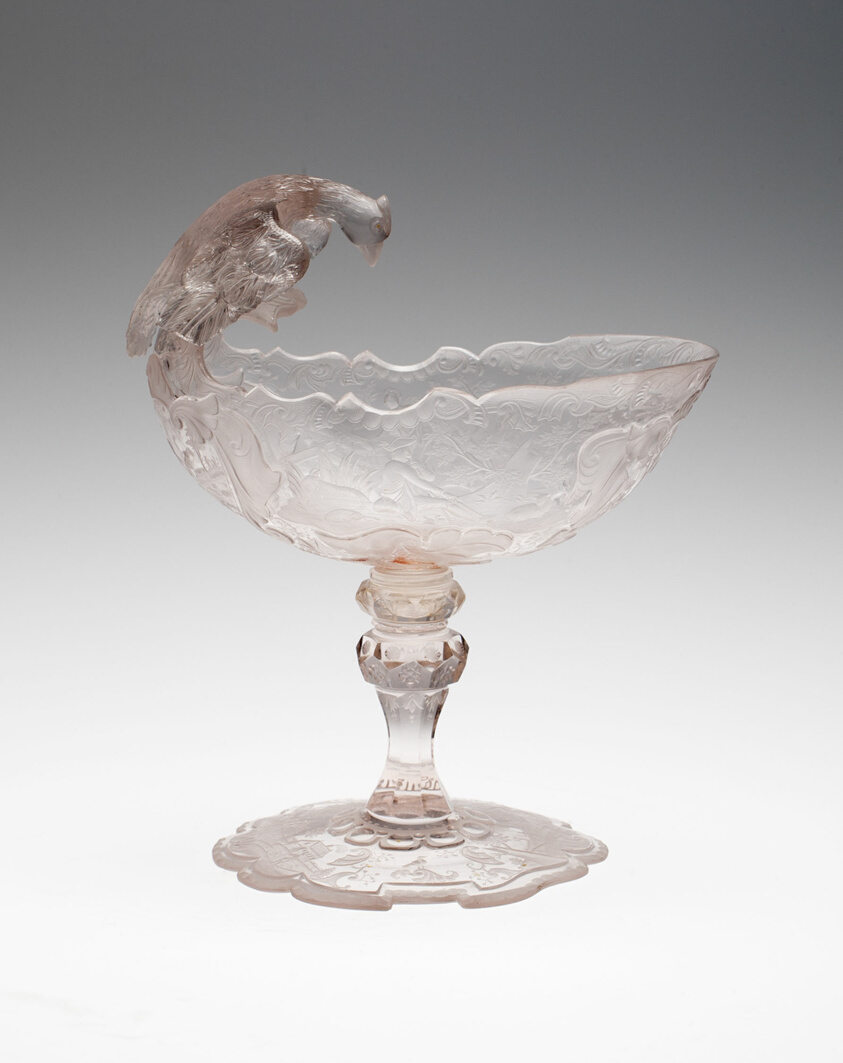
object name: Glass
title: Sweetmeat Dish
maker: Poland (formerly German Silesia)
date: c. 1750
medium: Glass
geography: Poland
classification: dish (vessel); glass; european decorative arts